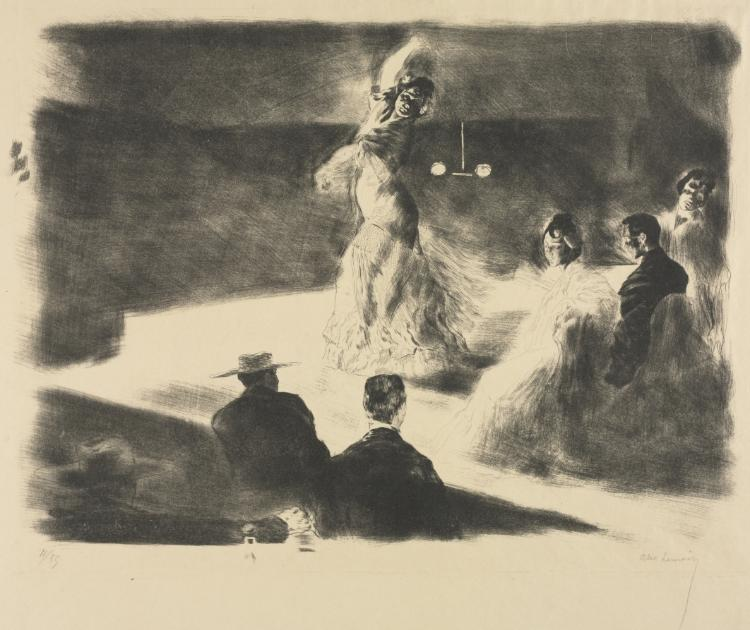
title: Spanish Dancer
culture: France, 19th century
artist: Alexandre Lunois (French, 1863–1916)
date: c. 1888–1914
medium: lithograph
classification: Print